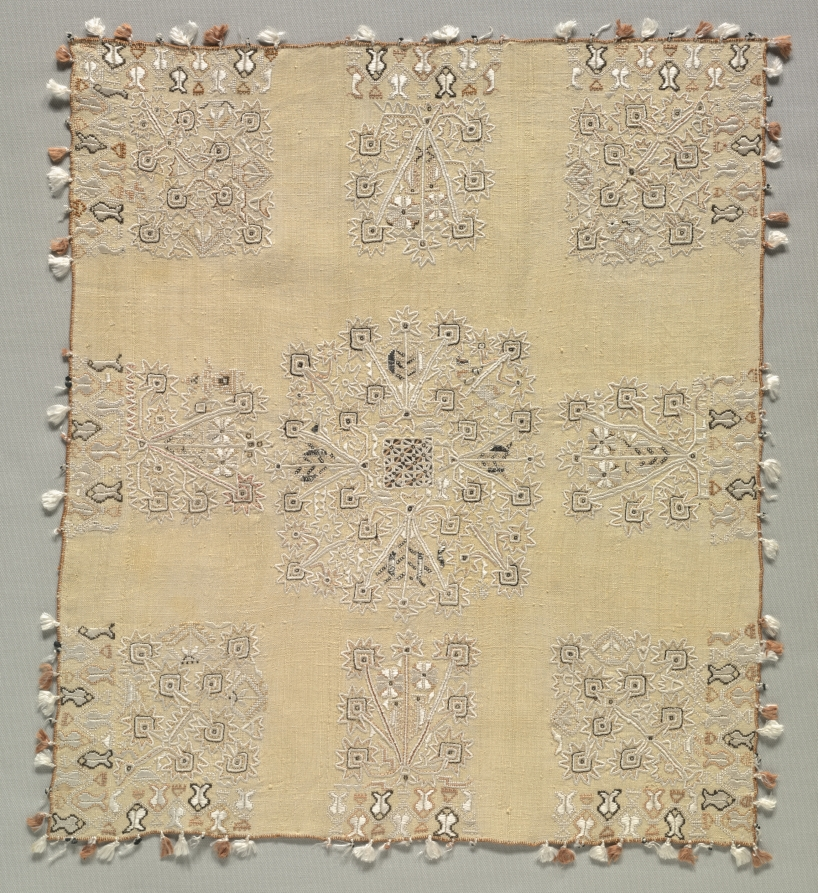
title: Kerchief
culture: Greece, Northern Islands, Chios ?, late 19th century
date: late 1800s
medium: embroidery, silk and metallic threads, on silk tabby ground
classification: Embroidery